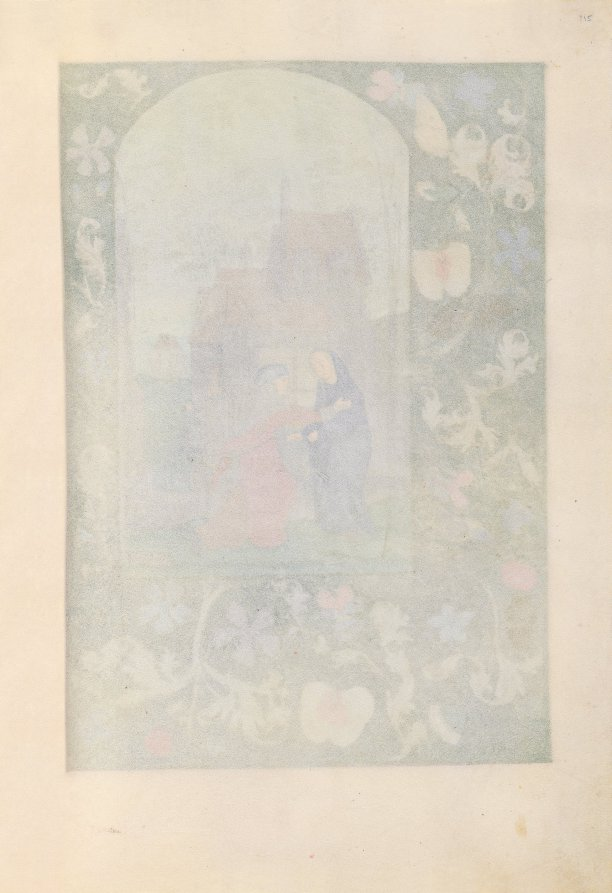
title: Hours of Queen Isabella the Catholic, Queen of Spain: Fol. 115r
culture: Flanders, Ghent and Bruges, late 15th century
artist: Master of the First Prayerbook of Maximillian (Flemish, c. 1444–1519)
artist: and Associates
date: c. 1500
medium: ink, tempera, and gold on vellum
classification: Bound Volume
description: This manuscript was illuminated by a circle of at least five highly organized manuscript painters active in the Flemish cities of Ghent and Bruges. The principal illuminator was Alexander Bening, who painted the majority of the book's miniatures. Manuscripts produced by this circle of artists are renowned for the decoration of their borders, which typically feature a rich variety of realistically-painted flowers, birds, and butterflies. This prayer book, called a book of hours, was intended not for a cleric, but for the private devotions of a lay person-in this case, Isabella the Catholic, Queen of Spain (1451-1504). Isabella's coat of arms embellishes the book's frontispiece. It is unlikely that the book was commissioned by the Queen herself; rather, she probably received it as a diplomatic gift from someone courting her patronage, perhaps Cardinal Francisco Jimenez de Cisneros. A Franciscan friar, Jimenez was dependent upon Isabella for his advancement, first to the post of Queen's confessor in 1492, and then to Archbishop of Toledo in 1495.